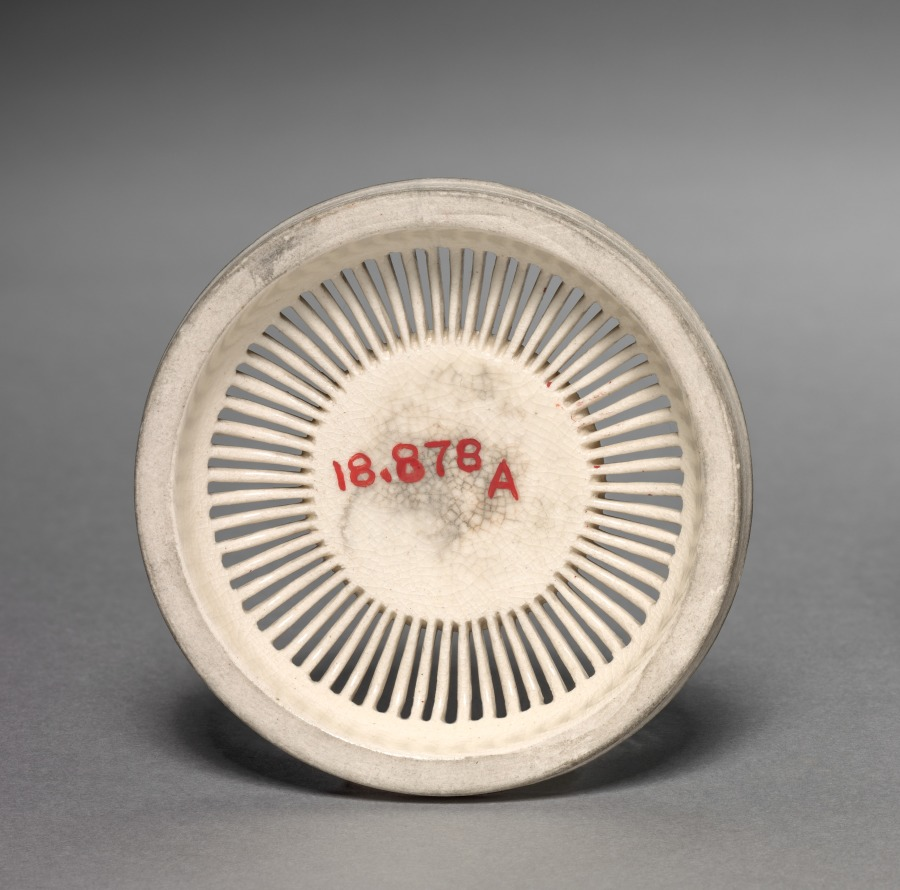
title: Jar (lid)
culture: Japan, Edo period (1615–1868)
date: early to mid-1800s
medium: pottery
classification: Ceramic